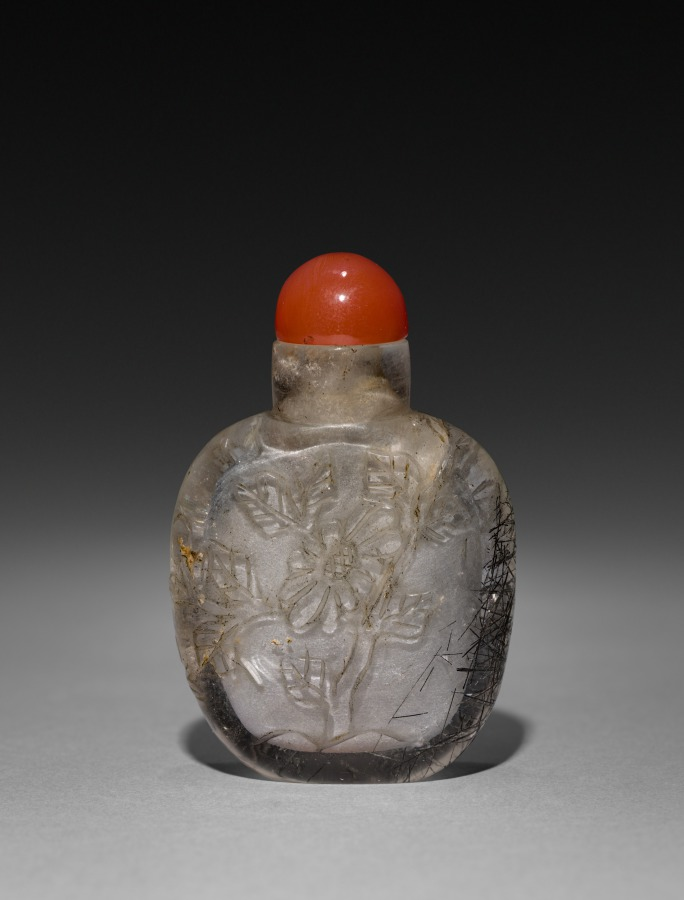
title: Snuff Bottle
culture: China, Qing dynasty (1644-1911)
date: 1644–1911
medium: glass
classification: Glass